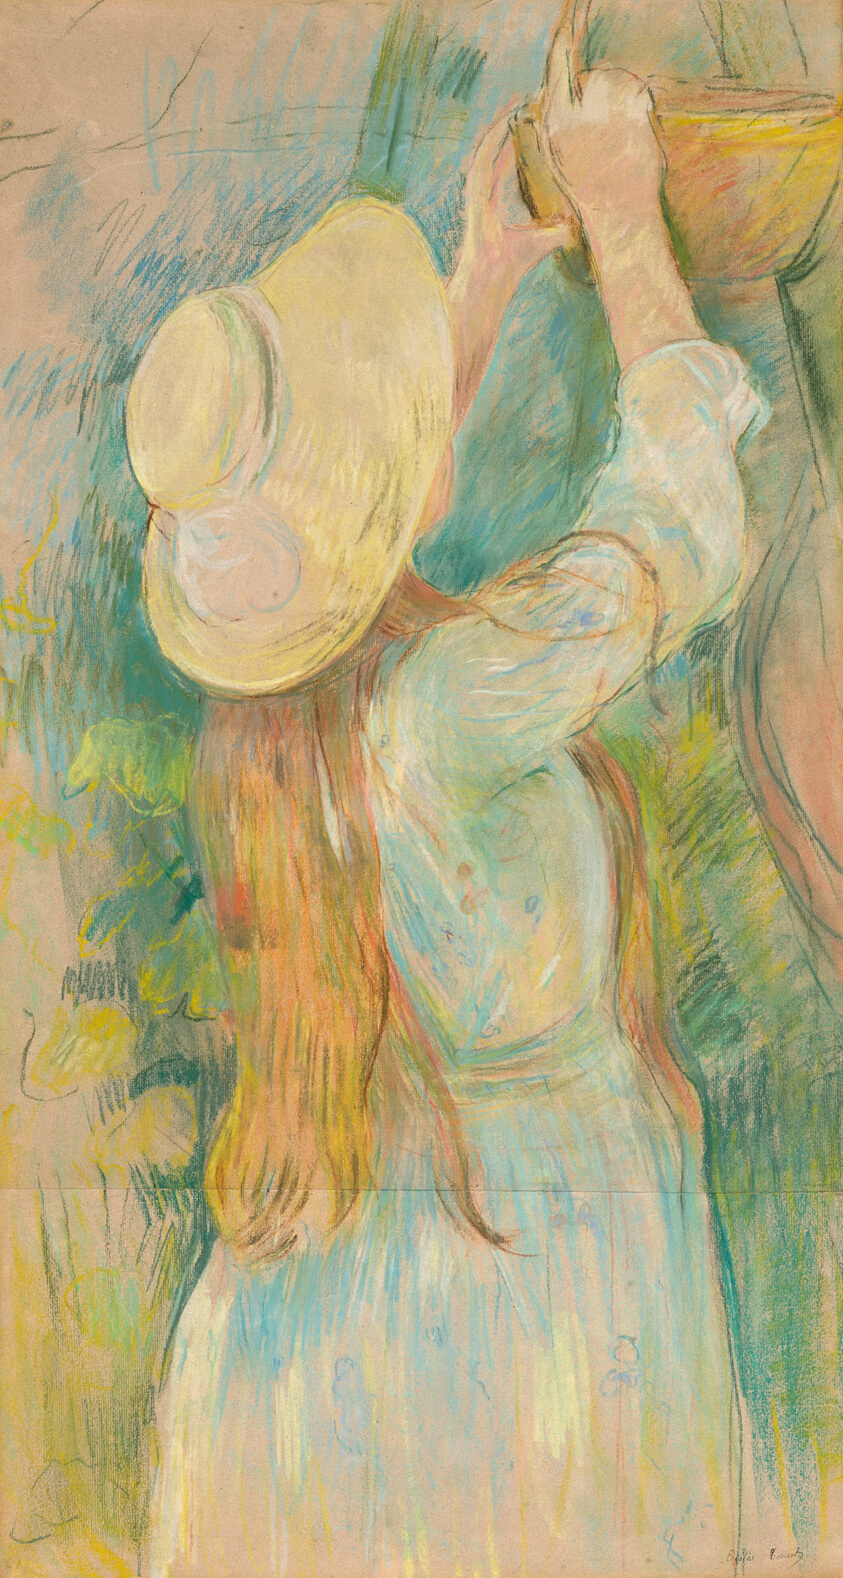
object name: Drawing and Watercolor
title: Young Girl Holding a Basket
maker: Berthe Morisot (French, 1841–1895)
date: 1891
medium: Pastel on pink laid paper with red fibrous inclusions (pieced at bottom), stretched and edge mounted on a honeycomb paper panel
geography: France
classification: prints and drawing; pastel; drawings (visual works)